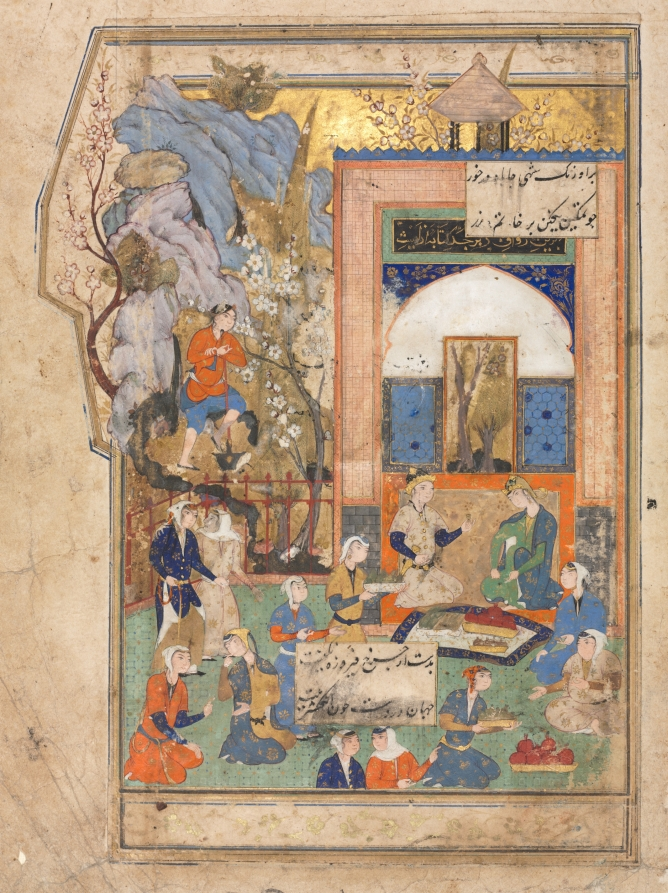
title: Yusuf and Zulaykha (recto), from an Anthology of Persian Verses, including the Haft Awrang (Seven Thrones) of Jami: The Fifth Throne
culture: Iran, Shiraz or Mashhad, Safavid period (1501–1722)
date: c. 1556–65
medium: Gum tempera, ink, and gold on paper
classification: Manuscript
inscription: Script: Nasta'liq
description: The painting quotes verses from the Haft Awrang (Seven Thrones) by the Persian poet Jami, a classic of Persian literature, here illustrating the romance of Yusuf and Zulaykha. Originally rooted in the Qur’an (Surah Yusuf, chapter 12), the Prophet Yusuf (Joseph) encounters the wife of the Egyptian governor, traditionally identified as Zulaykha, both seated opposite each other on the right, framed by architecture.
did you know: Figs and pomegranates, being served to the couple, are symbolic of fertility.